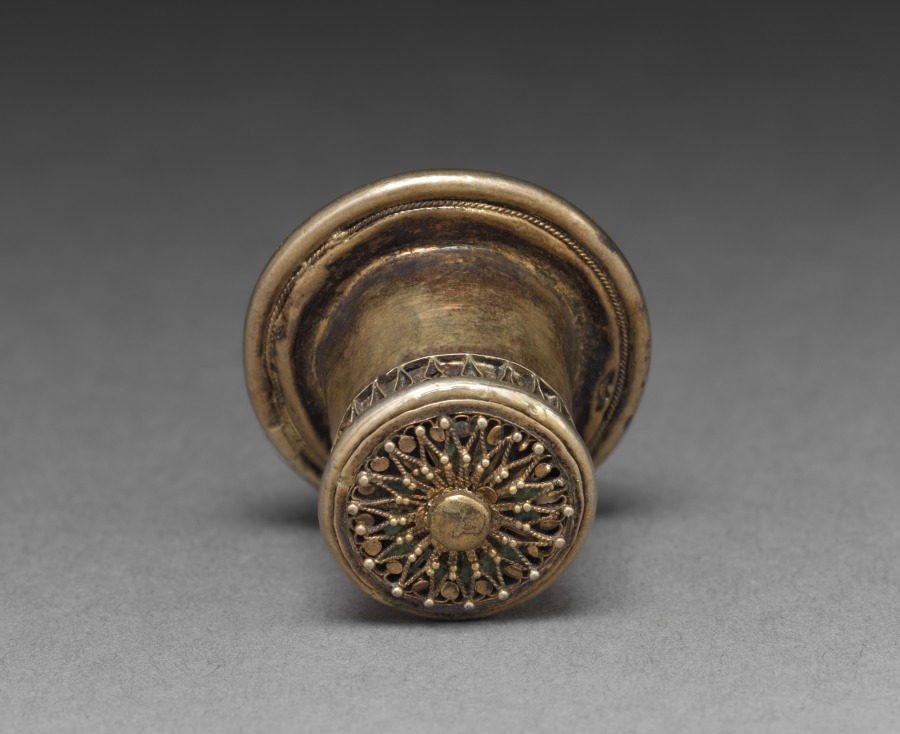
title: Ear Stud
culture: Burma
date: 1800s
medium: gold and rubies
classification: Jewelry